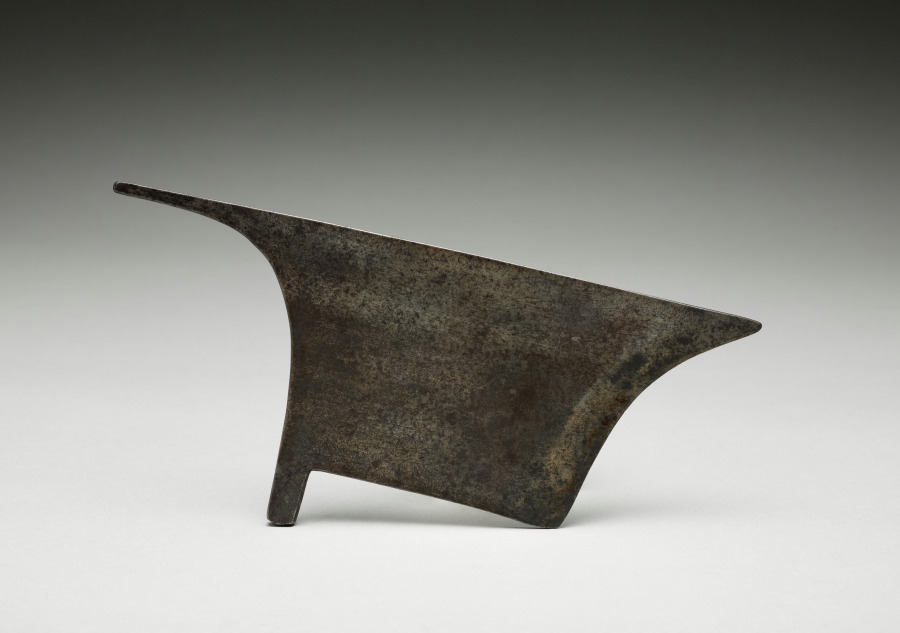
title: Head Axe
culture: Philippines, Northern Luzon, typical of Bontoc Province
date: before 1922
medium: Blade: metal; handle: wood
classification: Arms and Armor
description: This iron blade belongs to a Bontoc head axe, a northern Luzon weapon known for its heavy, compact form. The broad, triangular cutting surface, long, tapering rear spike, and short lower tang built to slot into a wooden shaft are all characteristic of northern Luzon. The shaft includes a protruding “thorn” or finger stop that provided a secure grip.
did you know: Though designed for severing a head, this hatchet also served utilitarian purposes, such as climbing.